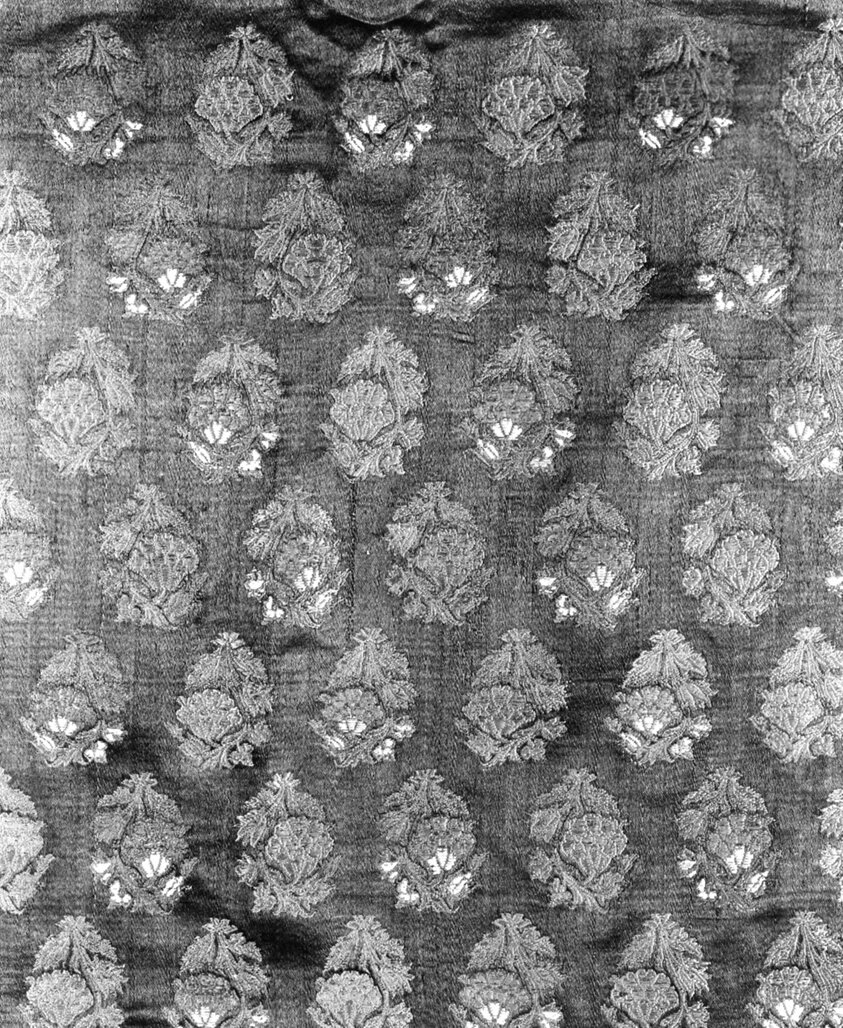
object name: Textile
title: Fragment (Dress Fabric)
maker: Iran (Persia, possibly Isfahan)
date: 18th century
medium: Brocaded satin, silk and gold wound on yellow silk core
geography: Iran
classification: textile; weaving